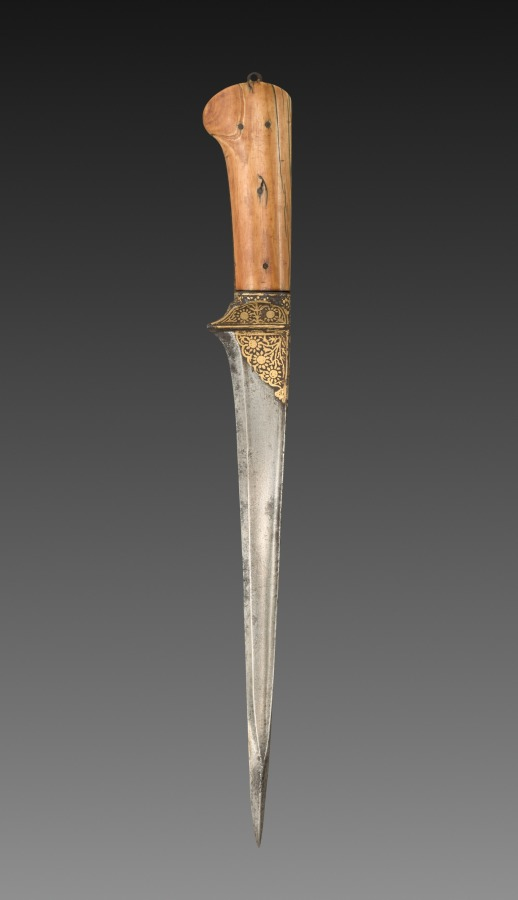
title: Dagger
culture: India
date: 1700s–1800s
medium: silver inlay and leather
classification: Arms and Armor